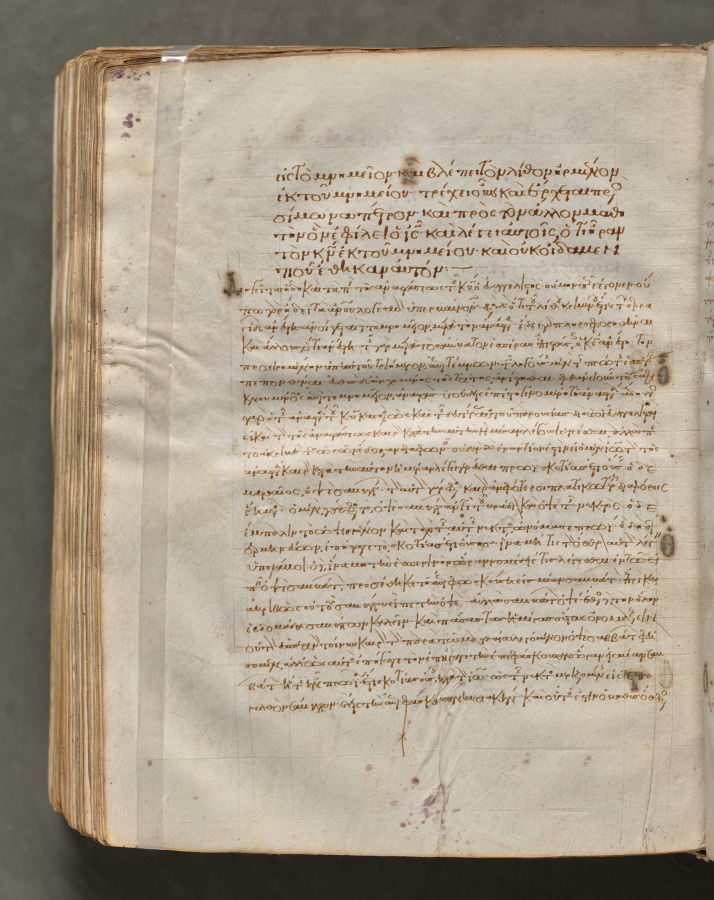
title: Text, folio 417 (verso), from a Gospel Book with Commentaries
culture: Byzantium, Constantinople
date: c. 1000–1100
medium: ink, tempera, and gold on vellum; leather binding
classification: Bound Volume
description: Each of the four gospels in this book opens on a page with brilliantly illuminated borders depicting the author of the text as well as birds—principally peacocks, symbols of the immortality of the soul—and fountains, representing the fountain of life and the salvation of the soul. This volume consists of 428 leaves with texts in Greek. Its level of sophistication suggests that it was probably written and decorated in a monastery in Constantinople.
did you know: Gospel books were carried in procession through Byzantine churches.